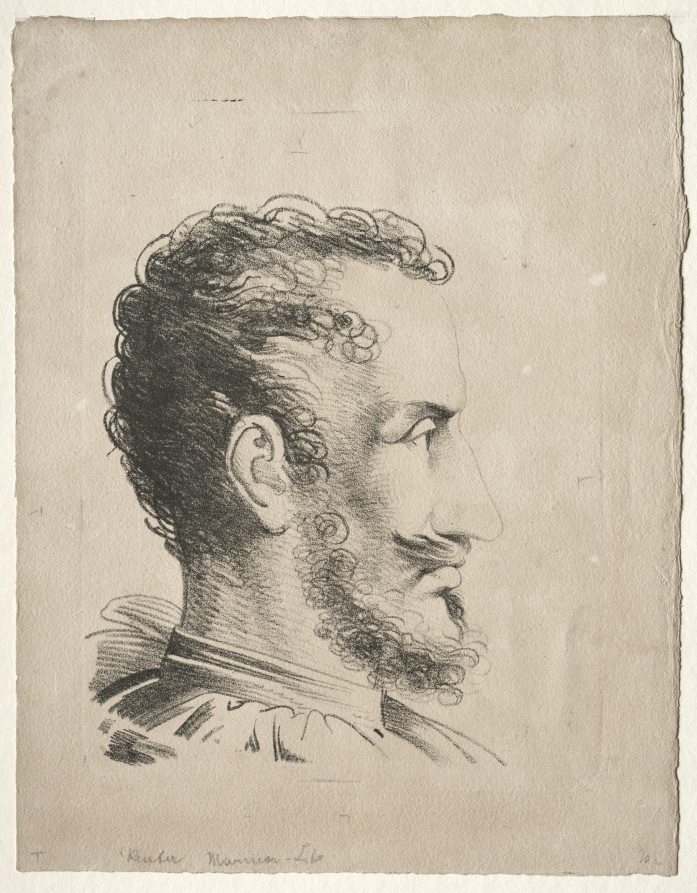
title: Profile Head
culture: Germany, 18th-19th century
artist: Friedrich Wilhelm Reuter (German, 1768–1834)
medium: lithograph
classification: Print